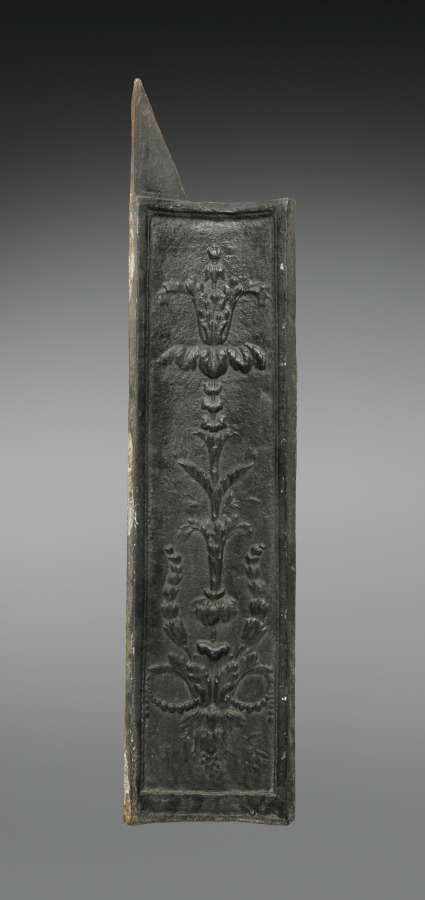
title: Set of Fire Linings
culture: France, style of Louis XVI, 18th Century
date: c. 1770–1780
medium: cast iron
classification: Furniture and woodwork